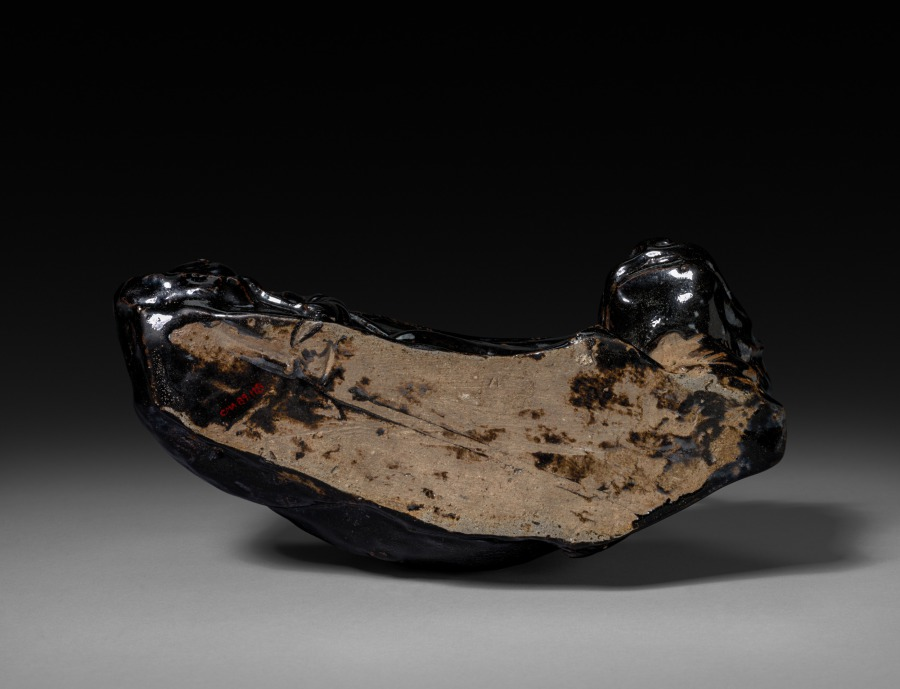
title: Pillow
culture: China, Yuan dynasty (1271-1368)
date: 1100s-1200s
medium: Glazed stoneware, Cizhou ware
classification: Ceramic